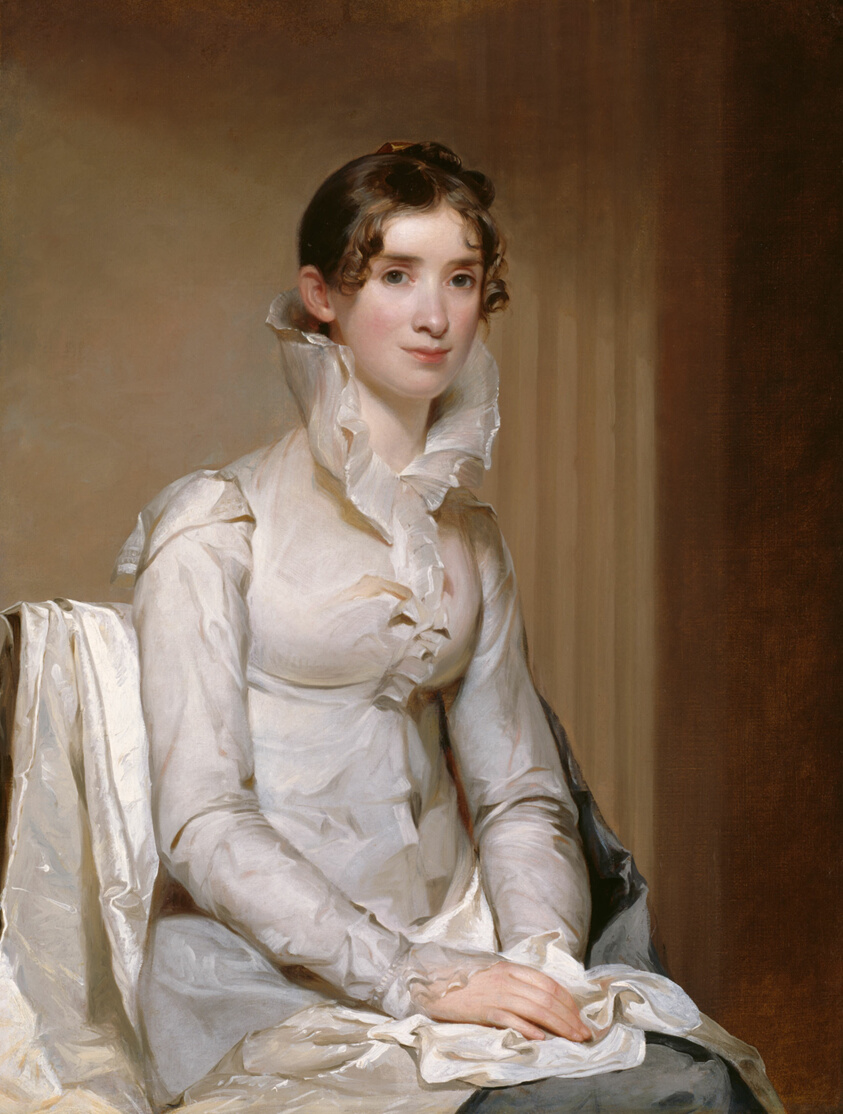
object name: Painting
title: Mrs. Klapp (Anna Milnor)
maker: Thomas Sully (American, born England, 1783–1872)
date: 1814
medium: Oil on canvas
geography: Philadelphia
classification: painting; american arts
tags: fashion, people, portraits